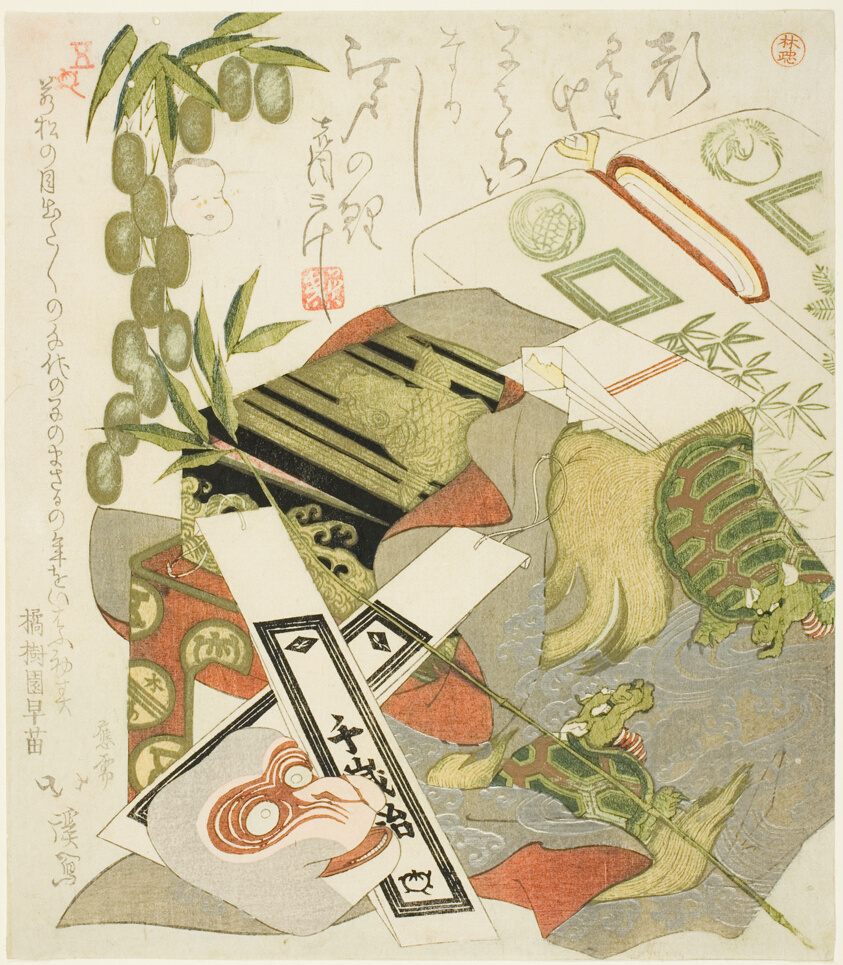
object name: Print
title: Still-Life with Monkey Mask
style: Japanese (culture or style)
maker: Totoya Hokkei (Japanese, 1780–1850)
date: 1824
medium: Color woodblock print with metallic pigments; surimono shikishiban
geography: Japan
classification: woodblock print; print; asian art